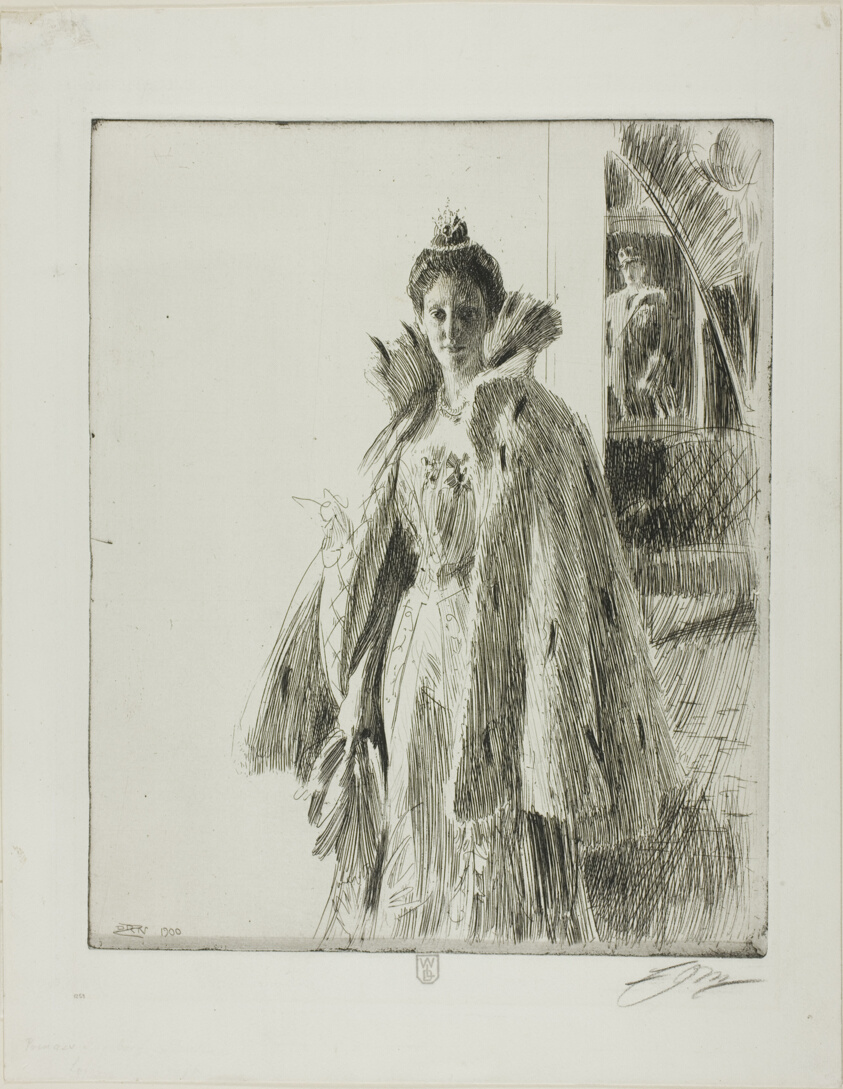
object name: Print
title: H. R. H. Princess Ingeborg of Sweden I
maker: Anders Zorn (Swedish, 1860-1920)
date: 1900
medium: Etching on white wove paper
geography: Sweden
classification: etching; print; prints and drawing